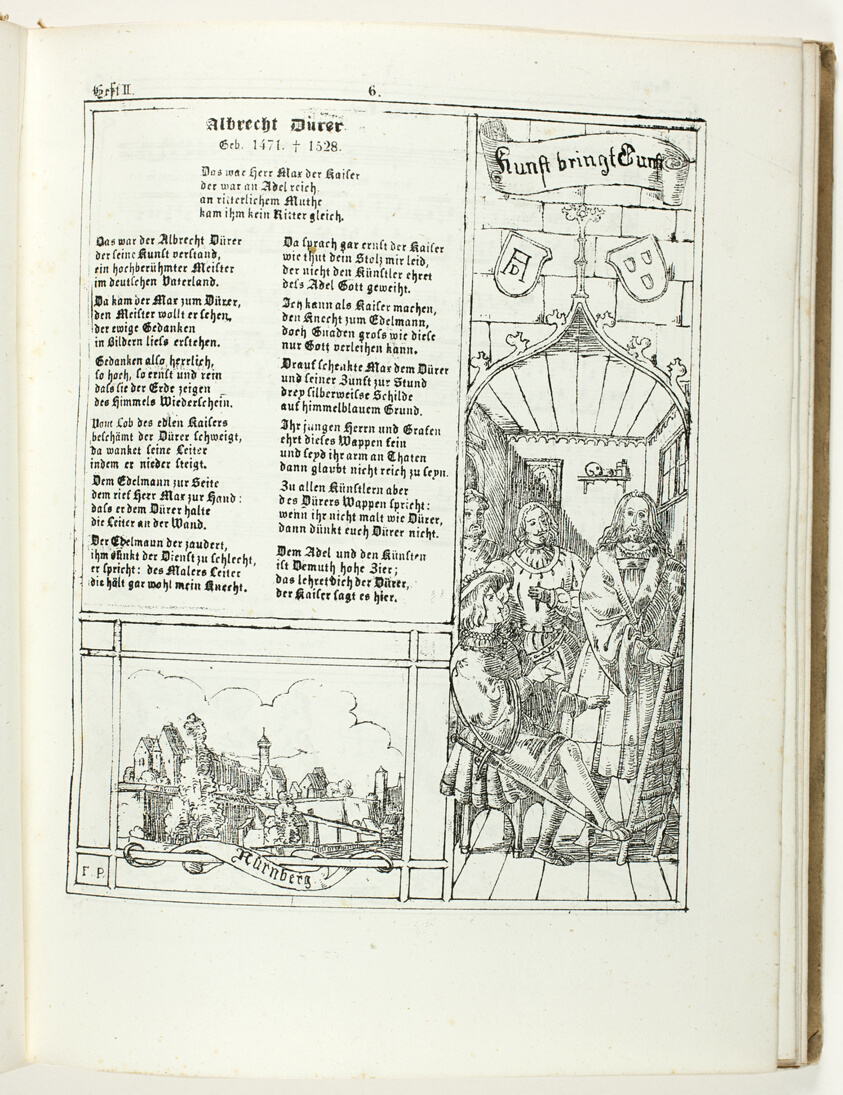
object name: Book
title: Feast Calendar in Pictures and Songs, Sacred and Secular (Fest-Kalender in Bildern und Liedern, Geistlich und Weltlich)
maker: Franz Graf von Pocci (German, 1807-1876); written by Guido Görres (German, 1805-1852)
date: 1834–39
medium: Book with lithographs in black on ivory wove paper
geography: Germany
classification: lithograph; print; prints and drawing; book